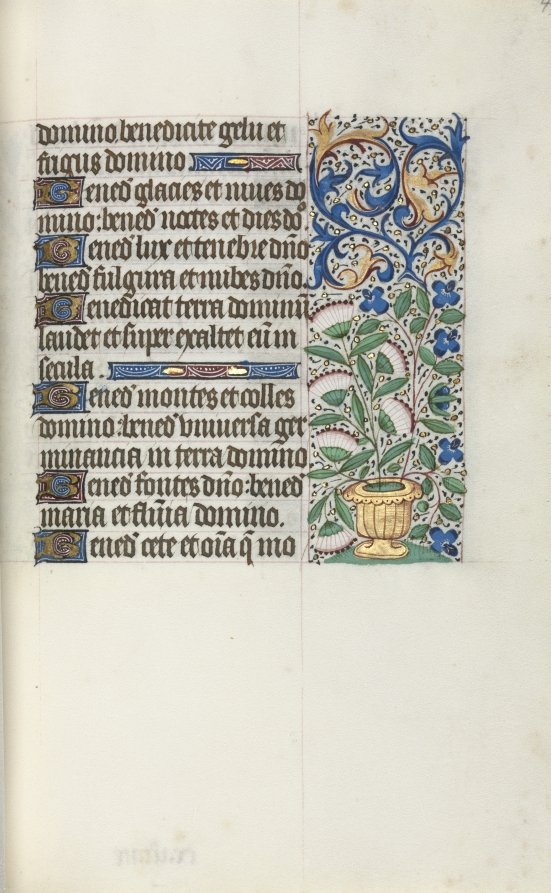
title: Book of Hours (Use of Rouen): fol. 43r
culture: France, Rouen, 15th century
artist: Master of the Geneva Latini (French, active Rouen, 1460–80)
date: c. 1470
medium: ink, tempera, and gold on vellum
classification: Bound Volume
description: In the late 1400s and early 1500s Rouen was an established and important center of book production. The city’s cathedral had a wealthy chapter that spent large sums of money to commission books and to maintain its extensive library. The stationers and booksellers would have likely been concentrated in or near the cathedral precinct. This artist, named after a manuscript now in Geneva, was Rouen’s principal illuminator during the second half of the 1400s.